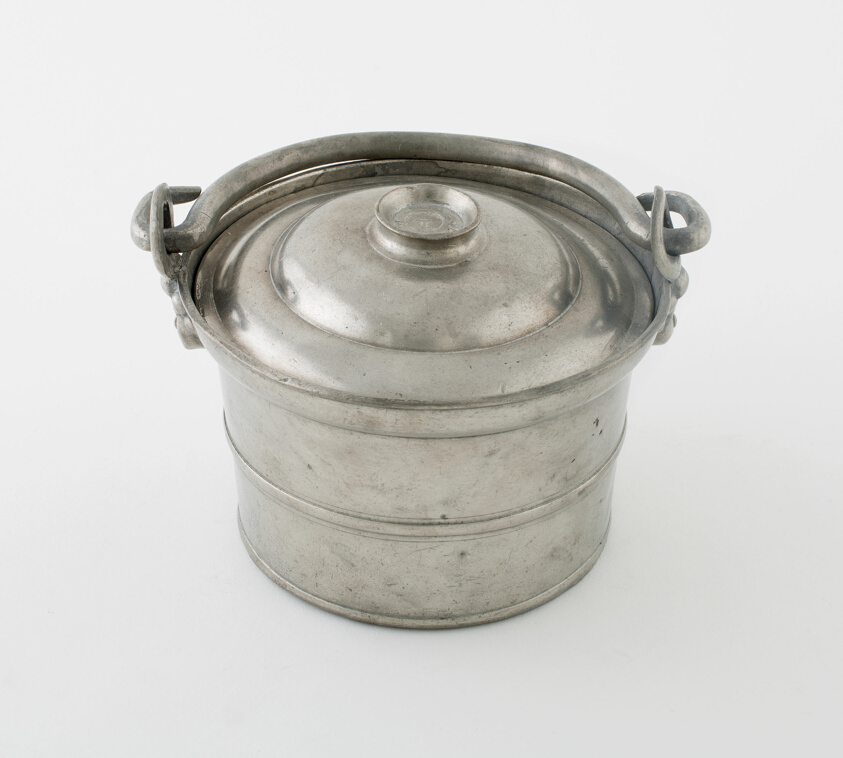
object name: Metalwork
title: Food Container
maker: Bouvier Family; French, active c. 1623-1881; Clamecy, France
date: 19th century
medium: Pewter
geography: France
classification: pewter; metalwork; european decorative arts